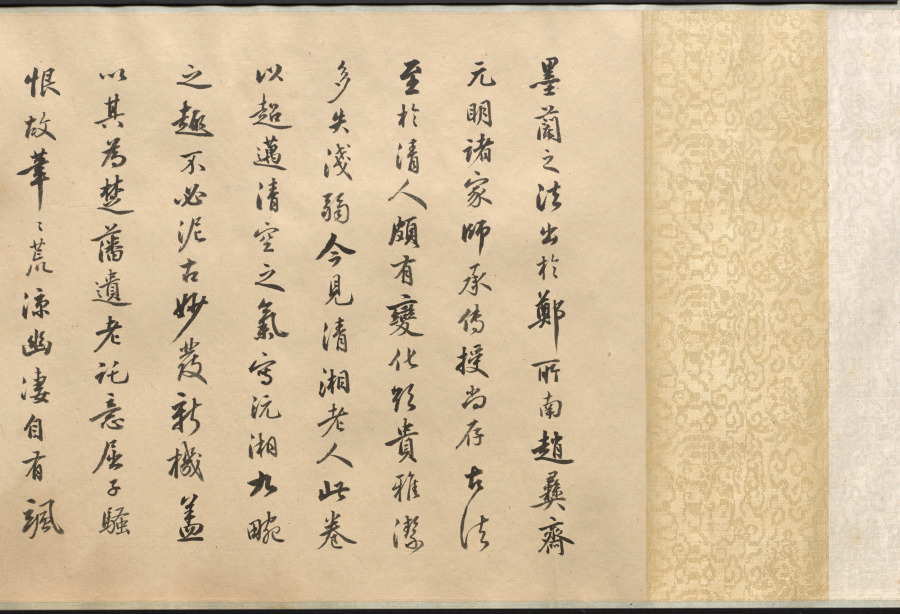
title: Rocks, Orchid, and Bamboo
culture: China, Qing dynasty (1644-1911)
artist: Shitao (Chinese, 1642–1707)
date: 1662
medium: handscroll; ink on paper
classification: Painting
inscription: Title colophon in four characters with signature and two seals on gold-flecked paper.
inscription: Artist's signature, inscription (with date of 1662), five seals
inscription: Colophon with two seals.